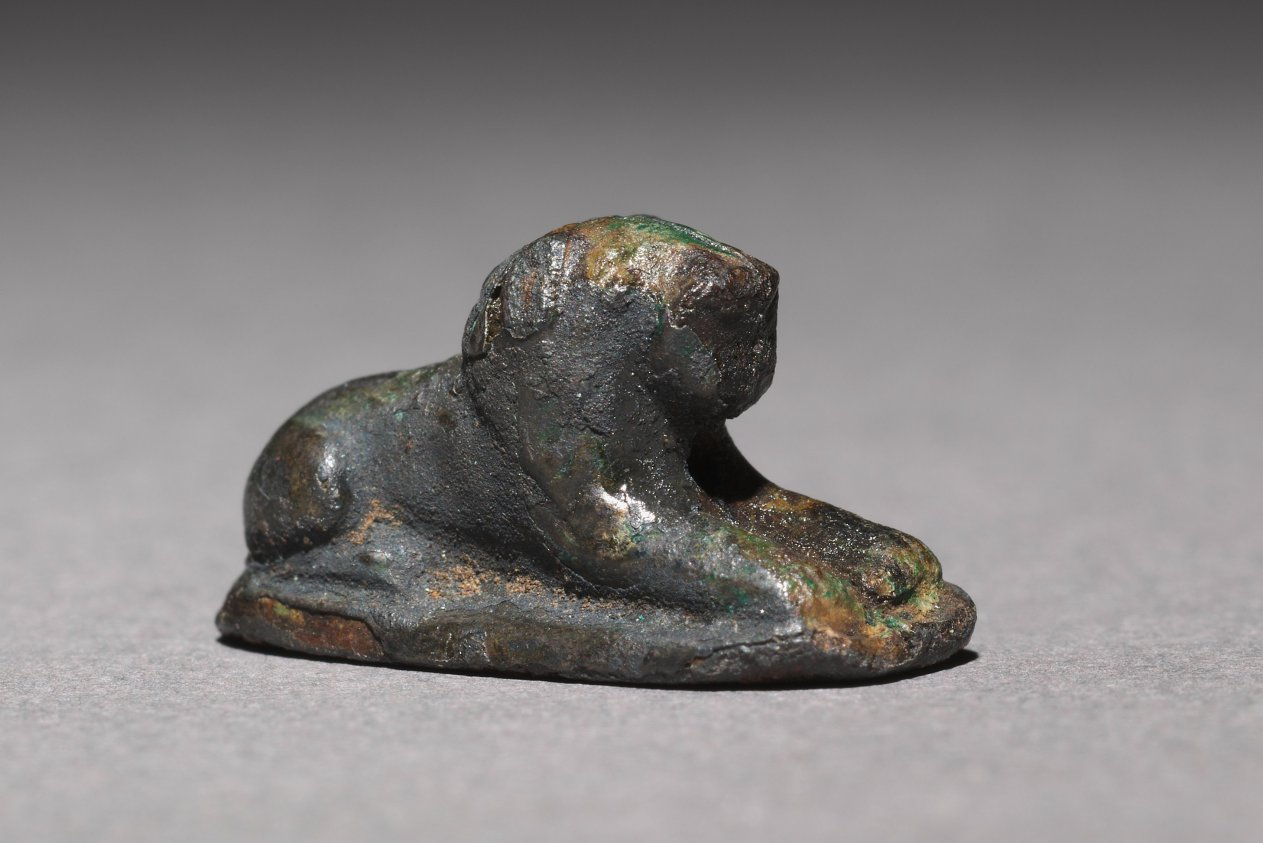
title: Recumbent Lion Bead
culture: Egypt, Middle Kingdom (2040–1648 BCE), Dynasty 12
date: 1980–1801 BCE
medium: silver foil over a clay-bulked resin core (?)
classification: Amulets